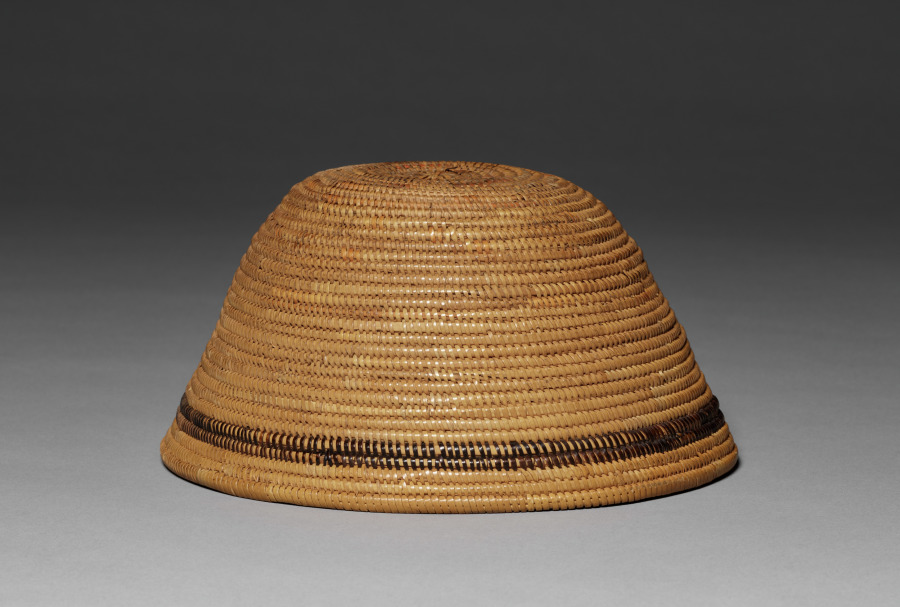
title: Hat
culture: California, Southern, Late 19th- Early 20th century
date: c 1875– 1925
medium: Juncus, Sumac; Coiled; Deergrass foundation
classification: Basketry